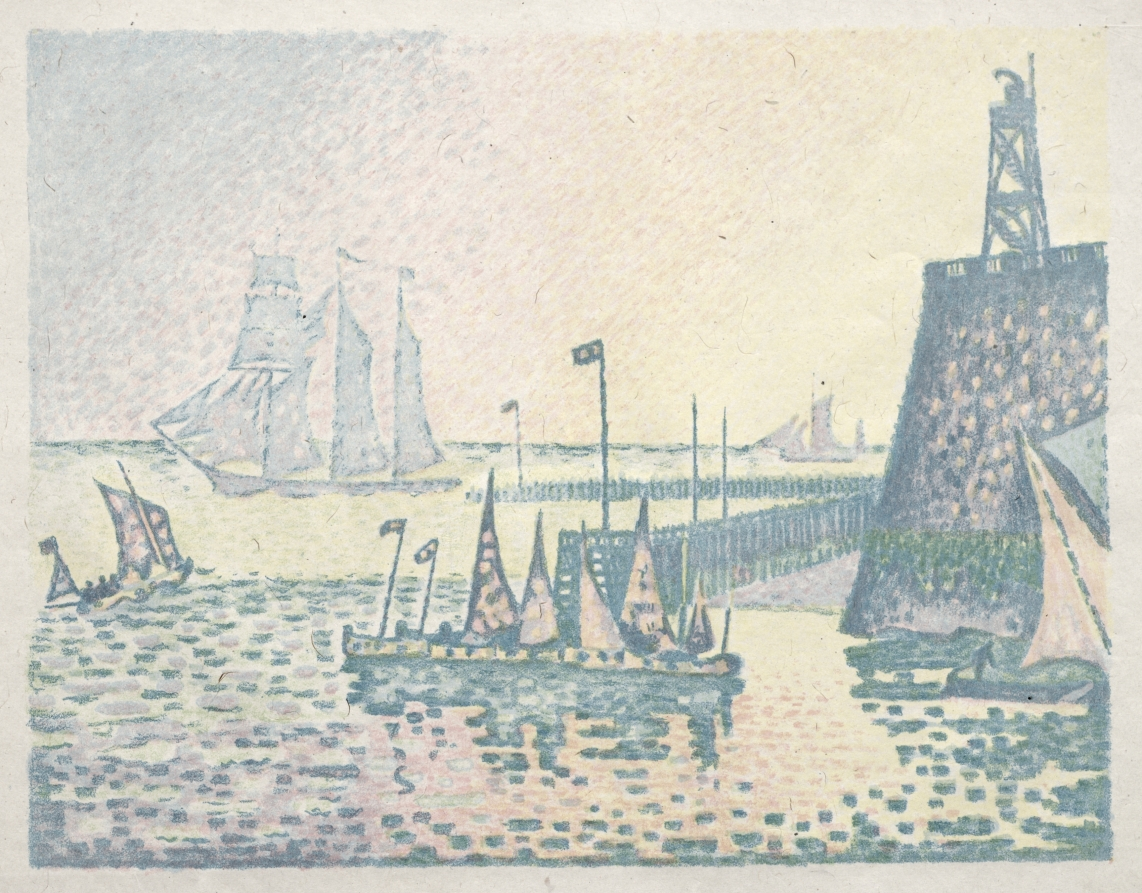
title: Evening, The Jetty at Vlissingen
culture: France, late 19th Century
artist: Paul Signac (French, 1863–1935)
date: 1898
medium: lithograph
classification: Print